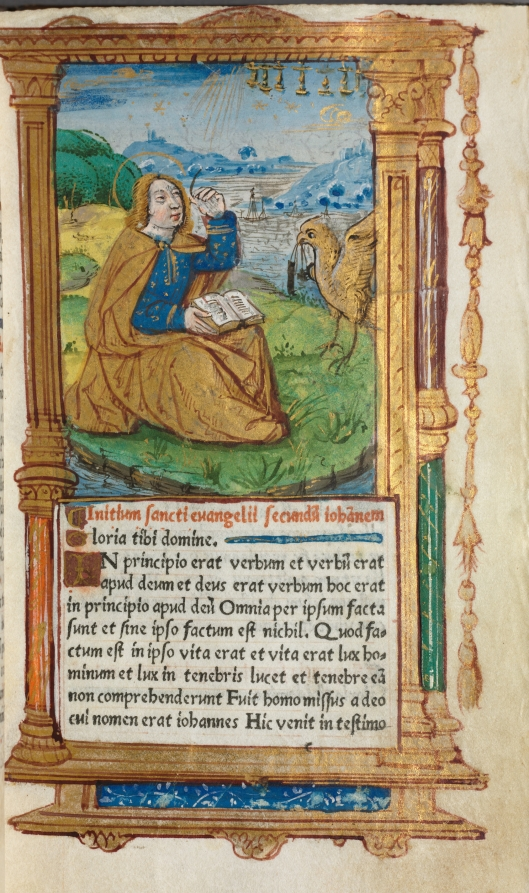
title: Printed Book of Hours (Use of Rome): fol. 17r, St. John on Patmos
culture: France, Paris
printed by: Guillaume Le Rouge (French, Paris, active 1493–1517)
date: 1510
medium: 112 Printed folios on parchment, bound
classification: Bound Volume